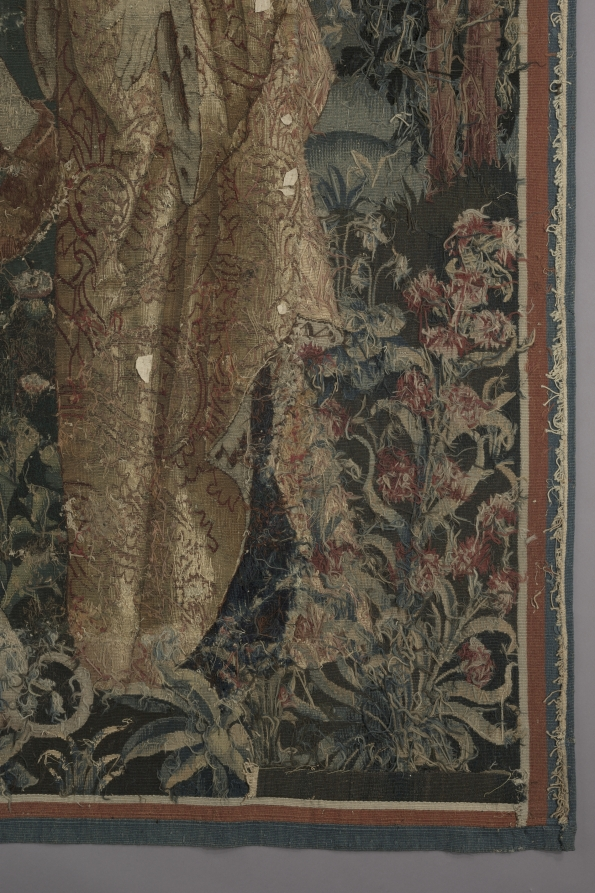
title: Shepherds in a Round Dance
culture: Netherlands, early 16th century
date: around 1500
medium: Wool and silk: tapestry weave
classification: Tapestry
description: Late medieval tapestries often use a limited yet contrasting color palette to portray stylized images. The expressions of these figures, for example, are conveyed more by their postures than by their faces. Four shepherds and shepherdesses join hands and dance to the music of a bagpiper at the far right, while a lord and two ladies on the left look on. A dog and sheep amid blossoming plants and trees contribute to the festive pastoral scene in front of a castle.